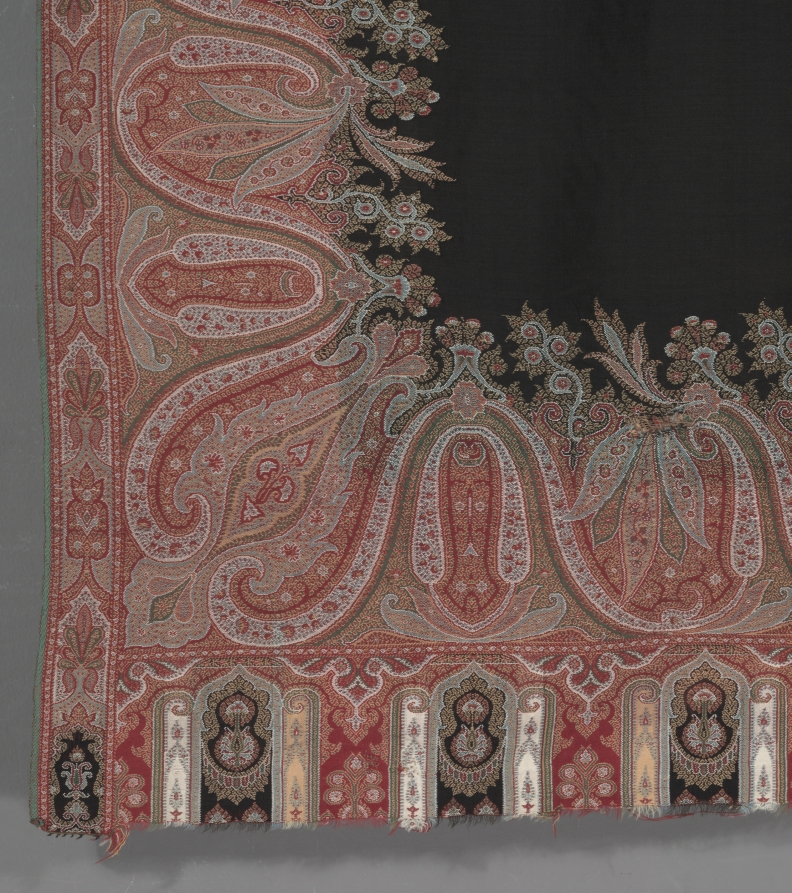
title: Square Shawl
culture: England, Norwich or France, Nimes, 19th century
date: c. 1870s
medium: wool, compound weave, additional weft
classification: Textile